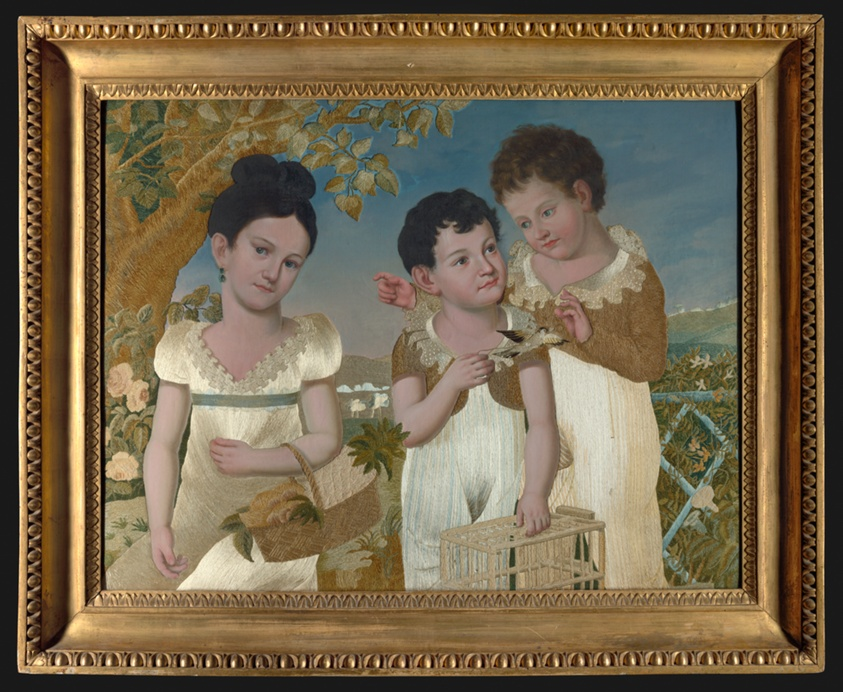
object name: Painting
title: Portraits of Serafina, Gaetanino and Ciccillo di Ottaiano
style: Neoclassicism, romantic, empire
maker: Embroidered by Princess Isabella Albertini de Medici di Ottaiano (Italian, 1784-1819); Painted by Marquis Filippo Petrone (Italian, active early 19th century)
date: 1815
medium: Silk embroidery and paint on a silk ground; original frame and glass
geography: Naples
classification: embroidery; painting; decorative arts; european decorative arts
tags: portraits: Italian subject, children, family, landscapes, bird